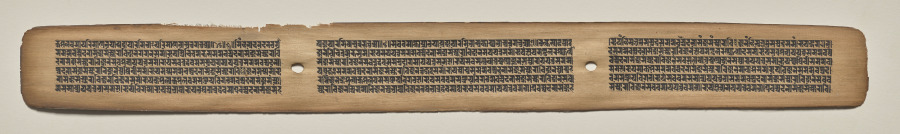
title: Text, folio 169 (recto), from a Manuscript of the Perfection of Wisdom in Eight Thousand Lines (Ashtasahasrika Prajnaparamita-sutra)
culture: Eastern India, Bihar, Vikramashila Monastery. Painting: Nepal, Kathmandu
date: Sunday, September 14, 1119 (year 239 of the Newar Samvat in the month of Ashvina)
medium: gum tempera and ink on palm leaves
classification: Painting